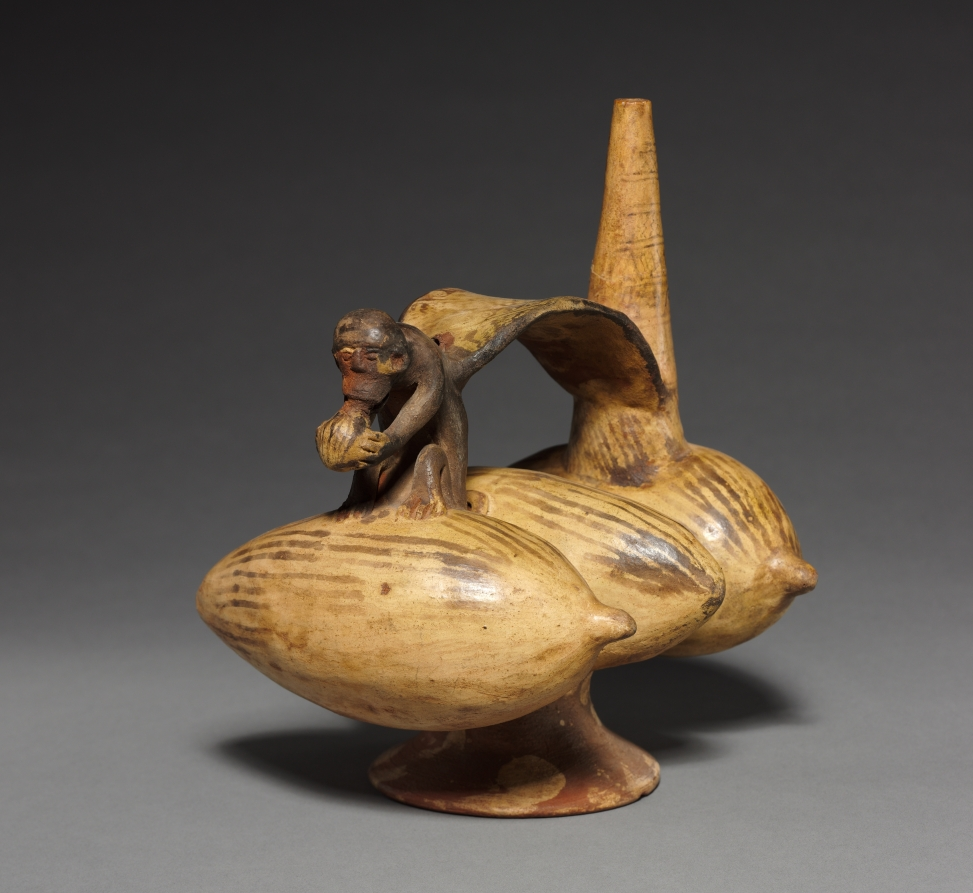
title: Stirrup Jar with Monkey and Three Fruits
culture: Peru, North Coast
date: 1000 or later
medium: red earthenware decorated with cream-colored slip and brown pigment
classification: Ceramic